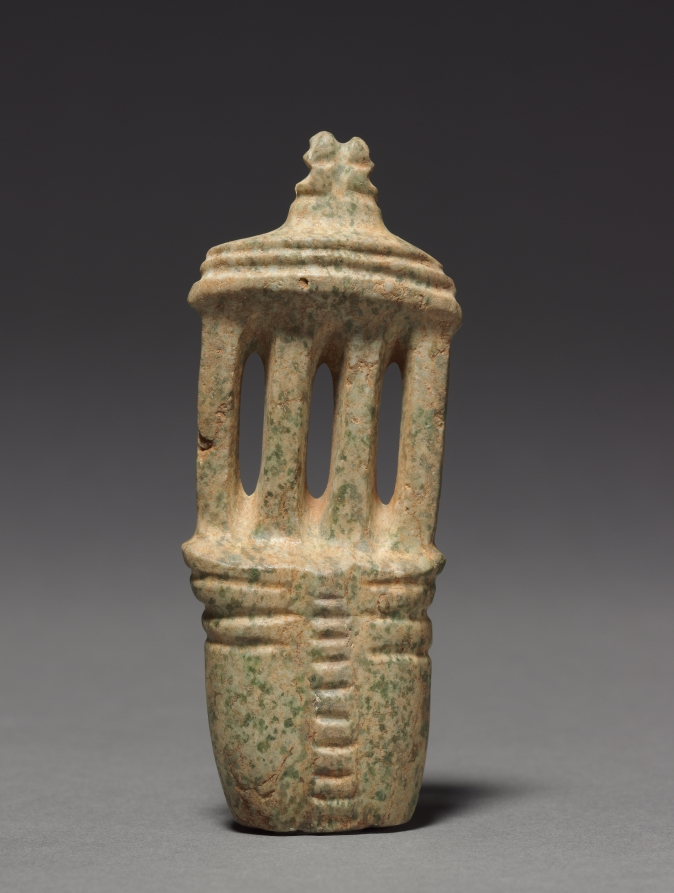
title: Architectural Model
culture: Mesoamerica, Mexico, Guerrero, Mezcala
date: 100 BCE–300 CE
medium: serpentine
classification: Sculpture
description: The Mezcala style takes its name from a river in its homeland, the Guerrero region of western Mexico. The style is known for small-scale stone sculptures including architectural “models” characterized by sleek abstraction. Because comparisons to actual architecture in the Mezcala region are scarce, it is not known whether the models refer to temples, houses, or underground funerary structures.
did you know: Mezcala architectural models reportedly come from burials, but few have been scientifically excavated.